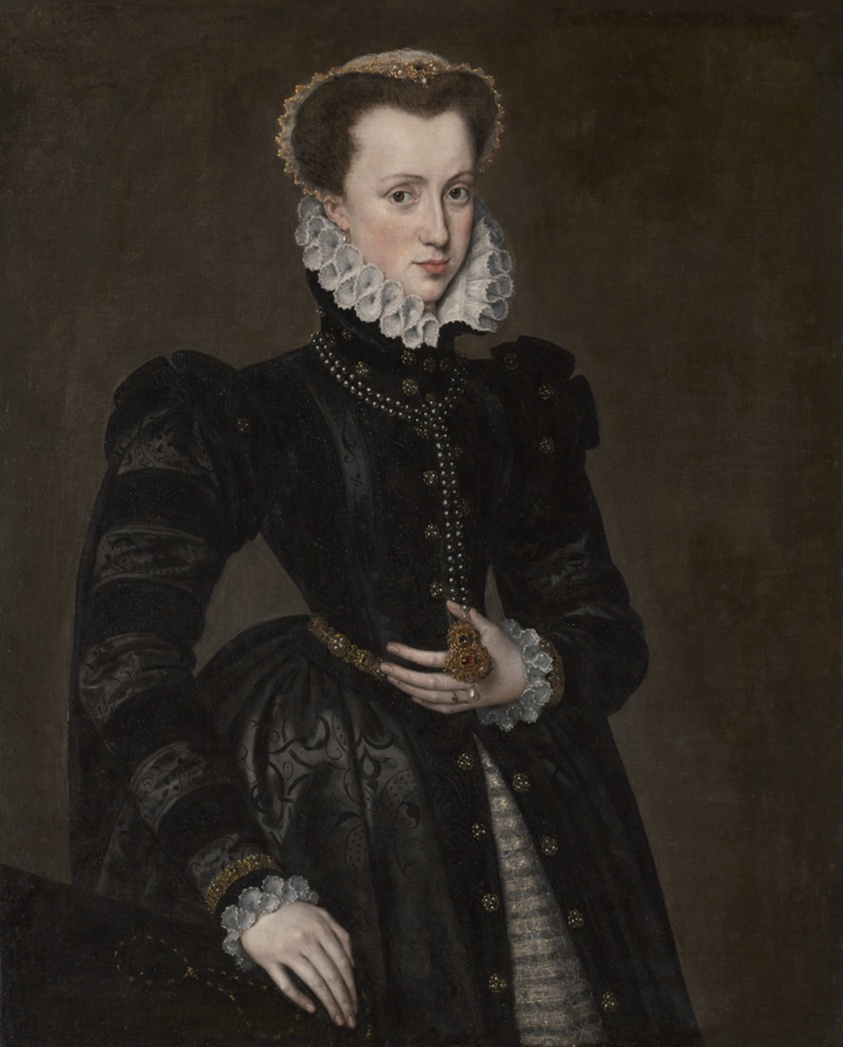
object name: Painting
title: Portrait of a Court Lady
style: sixteenth century, 16th Century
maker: Follower of Antonis Mor (Netherlandish, 1516/21-1575/77)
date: c. 1565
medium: Oil on canvas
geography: Netherlands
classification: painting; paint; oil paintings (visual works); oil on canvas; european painting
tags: portraits: female subject, portrait, portraits, woman, luxury, wealth, nobility, black (color), pearls, lace, jewelry